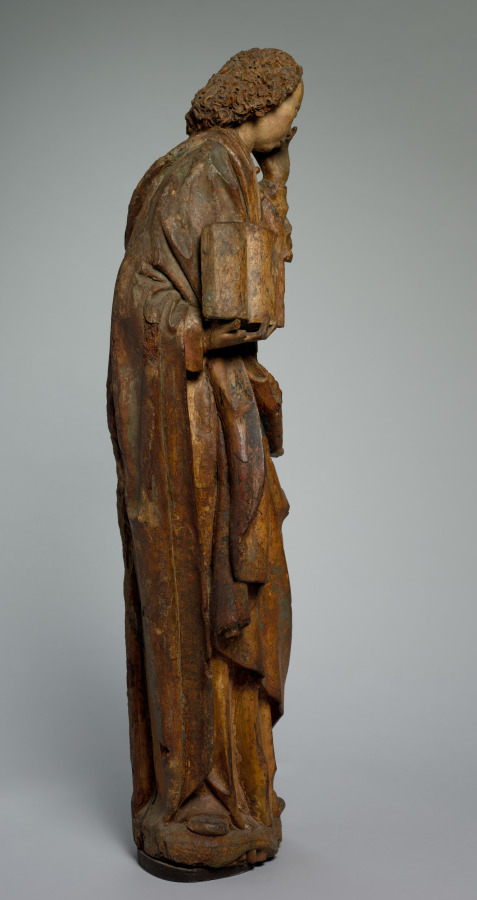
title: Saint John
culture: France, 15th century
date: 1450–1499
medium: wood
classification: Sculpture